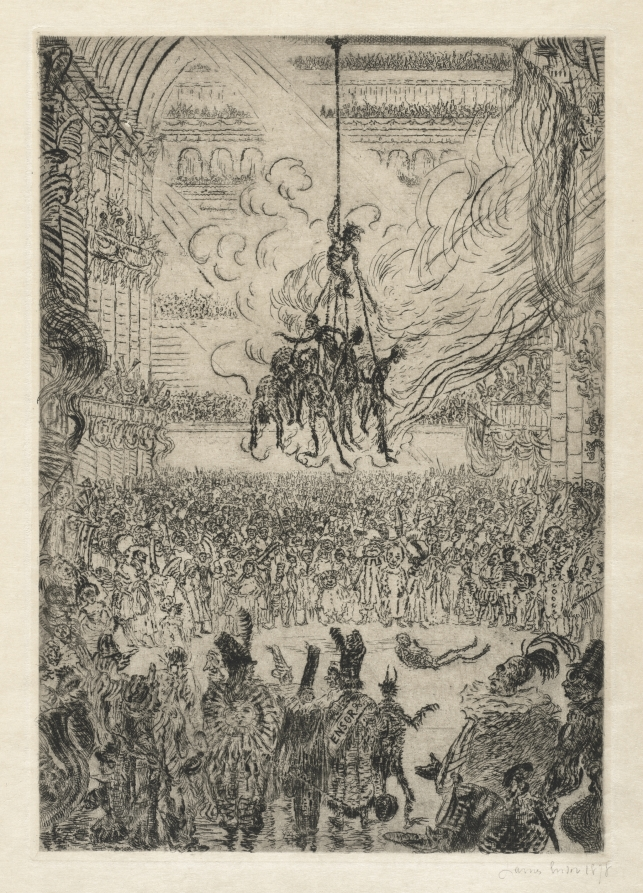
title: The Vengeance of Hop-Frog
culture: Belgium, 19th century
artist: James Ensor (Belgian, 1860–1949)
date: 1898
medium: etching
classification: Print